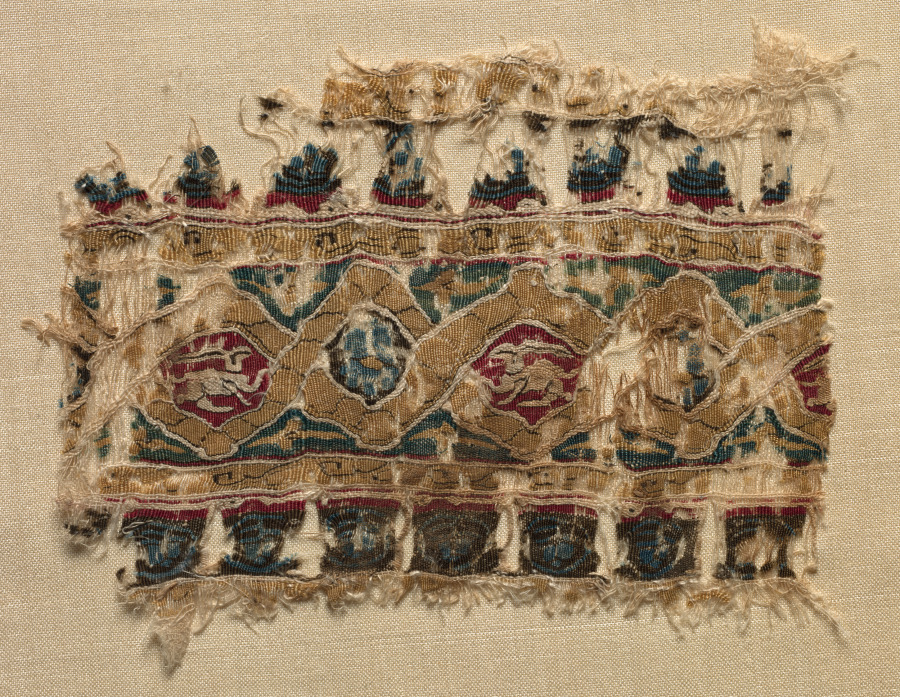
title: Fragment of a Tiraz-Style Textile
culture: Egypt, Fatimid period, Caliphate of al-Mustansir or al-Musta'li, c. AH 475-495 (A.D. 1081-1101)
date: 1081 – 1101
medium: tabby ground with inwoven tapestry ornament; linen and silk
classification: Textile